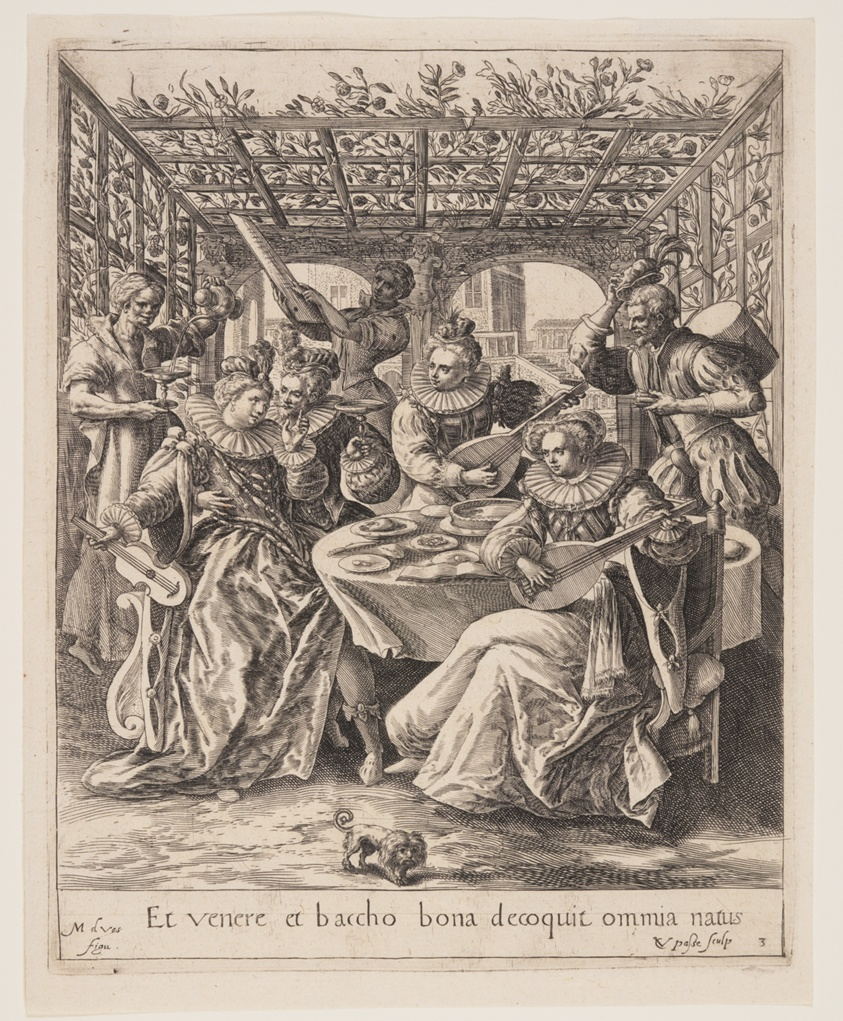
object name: Print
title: The Son Wasting his Heritage with Riotous Living, from The Parable of the Prodigal Son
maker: Crispijn van de Passe I (Dutch, c. 1565–1637); after Maarten de Vos (Flemish, 1532–1603)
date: c. 1600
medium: Engraving on ivory laid paper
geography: Netherlands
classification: engraving; paper; print; prints and drawing